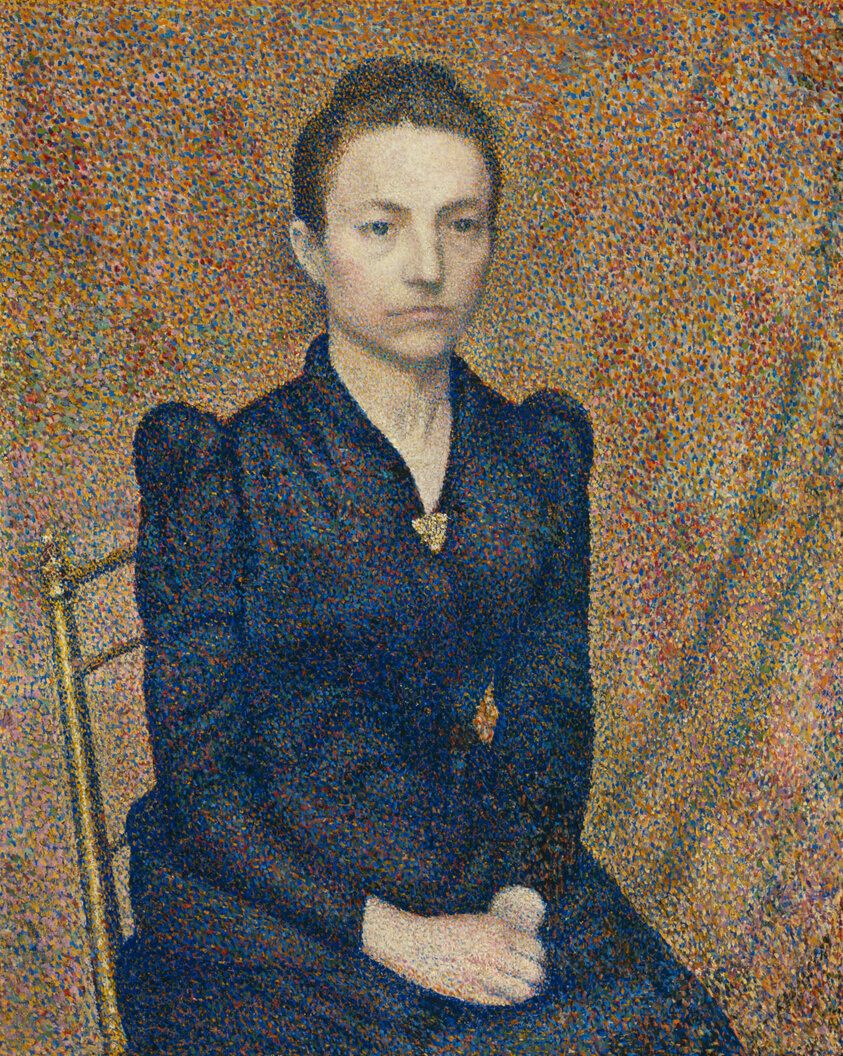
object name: Painting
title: Portrait of the Artist's Sister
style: Post-Impressionism, 19th century, nineteenth century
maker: Georges Lemmen (Belgian, 1865–1916)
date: 1891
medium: Oil on canvas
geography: Belgium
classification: oil on canvas; oil paintings (visual works); paint; portrait; painting; european painting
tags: women, blue (color), chair, dots, dresses, jewelry, portrait, portraits: female subject, red (color), sisters, emotions, families, portraits